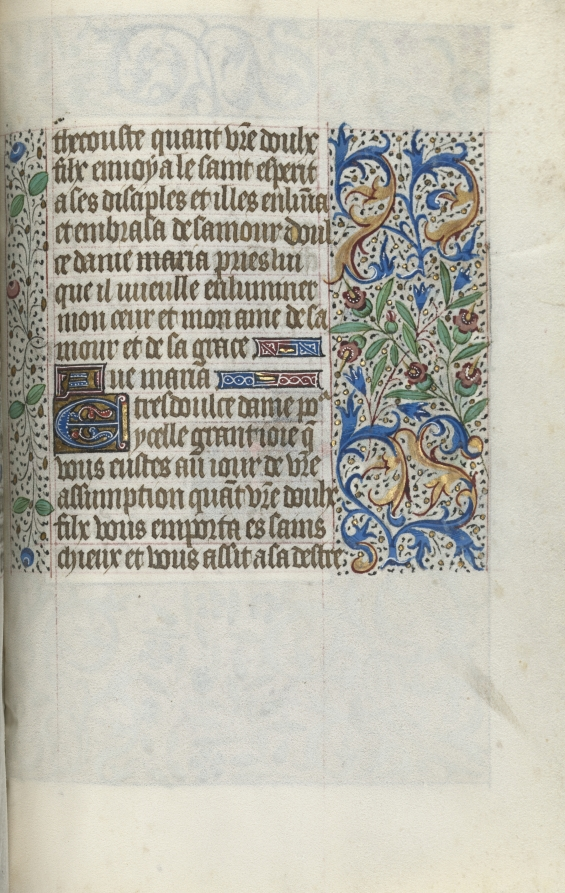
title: Book of Hours (Use of Rouen): fol. 151r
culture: France, Rouen, 15th century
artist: Master of the Geneva Latini (French, active Rouen, 1460–80)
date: c. 1470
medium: ink, tempera, and gold on vellum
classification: Bound Volume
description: In the late 1400s and early 1500s Rouen was an established and important center of book production. The city’s cathedral had a wealthy chapter that spent large sums of money to commission books and to maintain its extensive library. The stationers and booksellers would have likely been concentrated in or near the cathedral precinct. This artist, named after a manuscript now in Geneva, was Rouen’s principal illuminator during the second half of the 1400s.